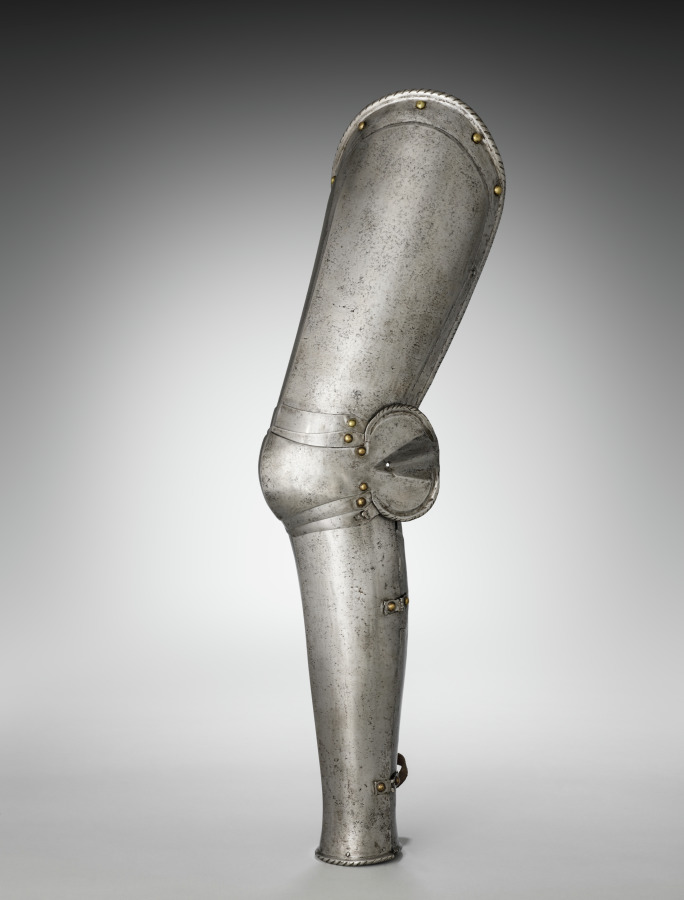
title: Proper Left Cuisse and Knee Cop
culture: South Germany, 16th century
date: c. 1560–1580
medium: steel, leather straps, brass rivets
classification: Arms and Armor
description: This armor was developed for the joust-a sporting combat between two mounted contestants. Although all of the elements of this armor date from the same period, they are not all from the same suit. This armor is thus called "composed." It also shows the asymmetry of jousting armor. The participants rode along a wall-like barrier known as a "tilt" with their left sides facing one another. Consequently, armor on that side of the body had to be thicker. Note the large plate (grandguard) over the left shoulder for extra protection. Also, the breathing holes in the helmet were placed on the right side (farthest from an opponent's lance) to avoid injuries from splinters. The bracket attached to the right breastplate is called the lance-rest, a shock-absorbing support designed to accommodate the lance when "couched" under the right armpit.